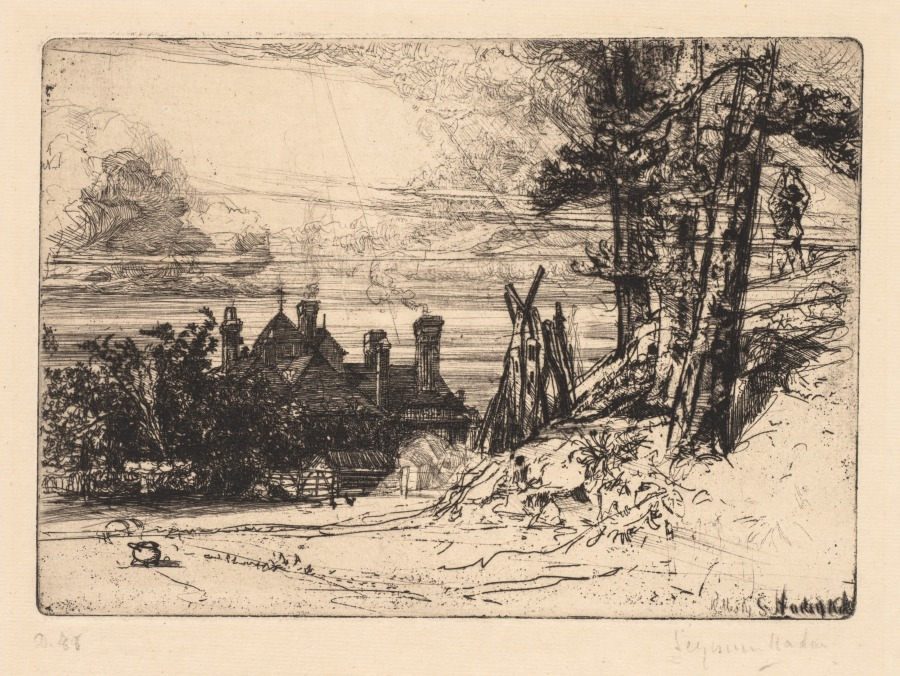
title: Horsley’s House at Willesley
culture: Britain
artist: Francis Seymour Haden (British, 1818–1910)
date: 1865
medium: etching and drypoint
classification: Print